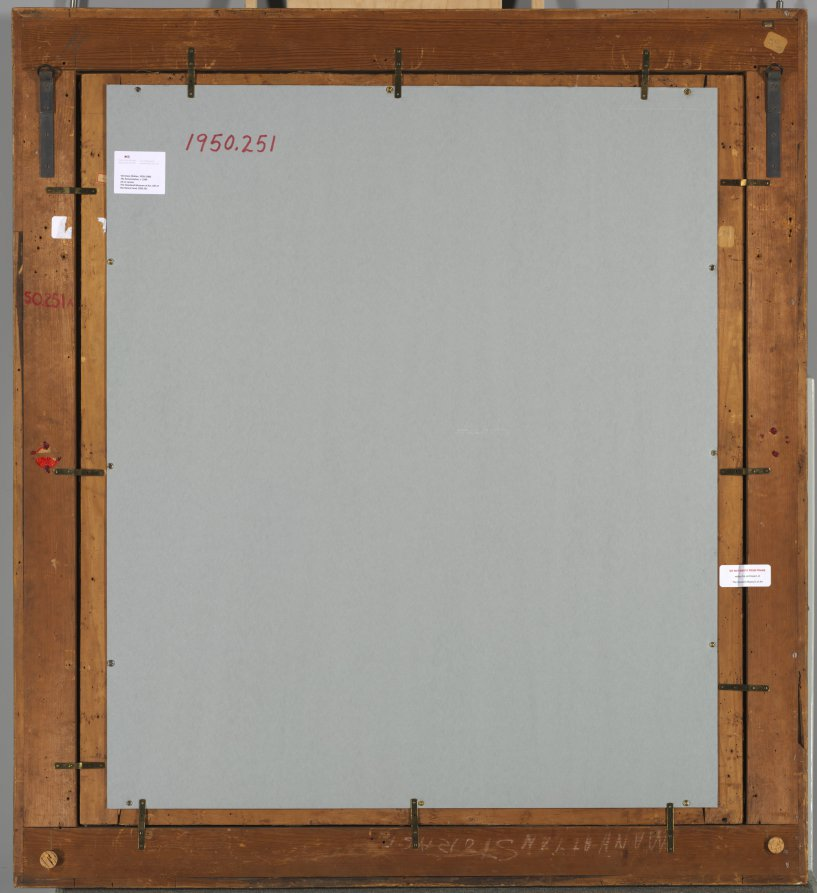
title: The Annunciation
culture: Italy, 16th century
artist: Paolo Veronese (Italian, 1528–1588)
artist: and Workshop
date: c. 1580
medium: oil on canvas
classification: Painting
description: Although Veronese is best known for his large-scale, pageant-like presentations, here the artist has taken the narrative of the Annunciation (the announcement of the angel Gabriel to the Virgin Mary that she would conceive and bear a son) and compressed the figures close to one another, creating a startling intimacy. According to a tradition established by the medieval writer Saint Bernard, Mary has been reading from the Old Testament prophecy of Isaiah (7:14), "A young woman is with child and she will bear a son."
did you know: The white lilies held by Gabriel are a symbol of Mary's purity and innocence, often appearing in depictions of the Annunciation.